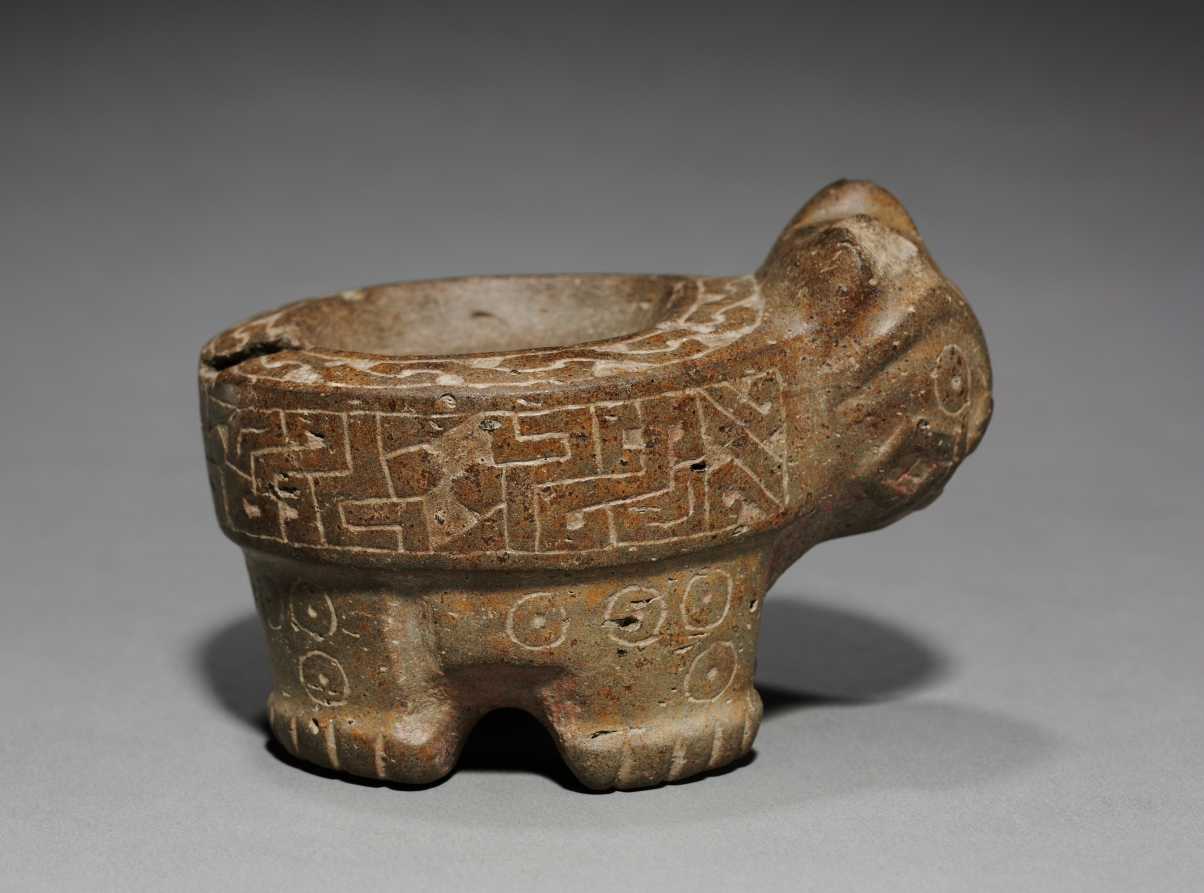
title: Feline Mortar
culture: Peru, North Highlands, Pacopampa(?), Chavín style (900-200 BCE)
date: 700–1 BCE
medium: stone, pigment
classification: Stone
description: Size suggests that this Chavín-style mortar was not used to grind bulky staples like corn, but instead pigments or plant hallucinogens used in religious rites to achieve spiritual insight and communion with cosmic forces. This may come from Pacopampa, a site in the northern highlands where elites adopted Chavín deities and worshiped them alongside local deities. These small sculptures illustrate the appeal and the spread of Chavín religion.